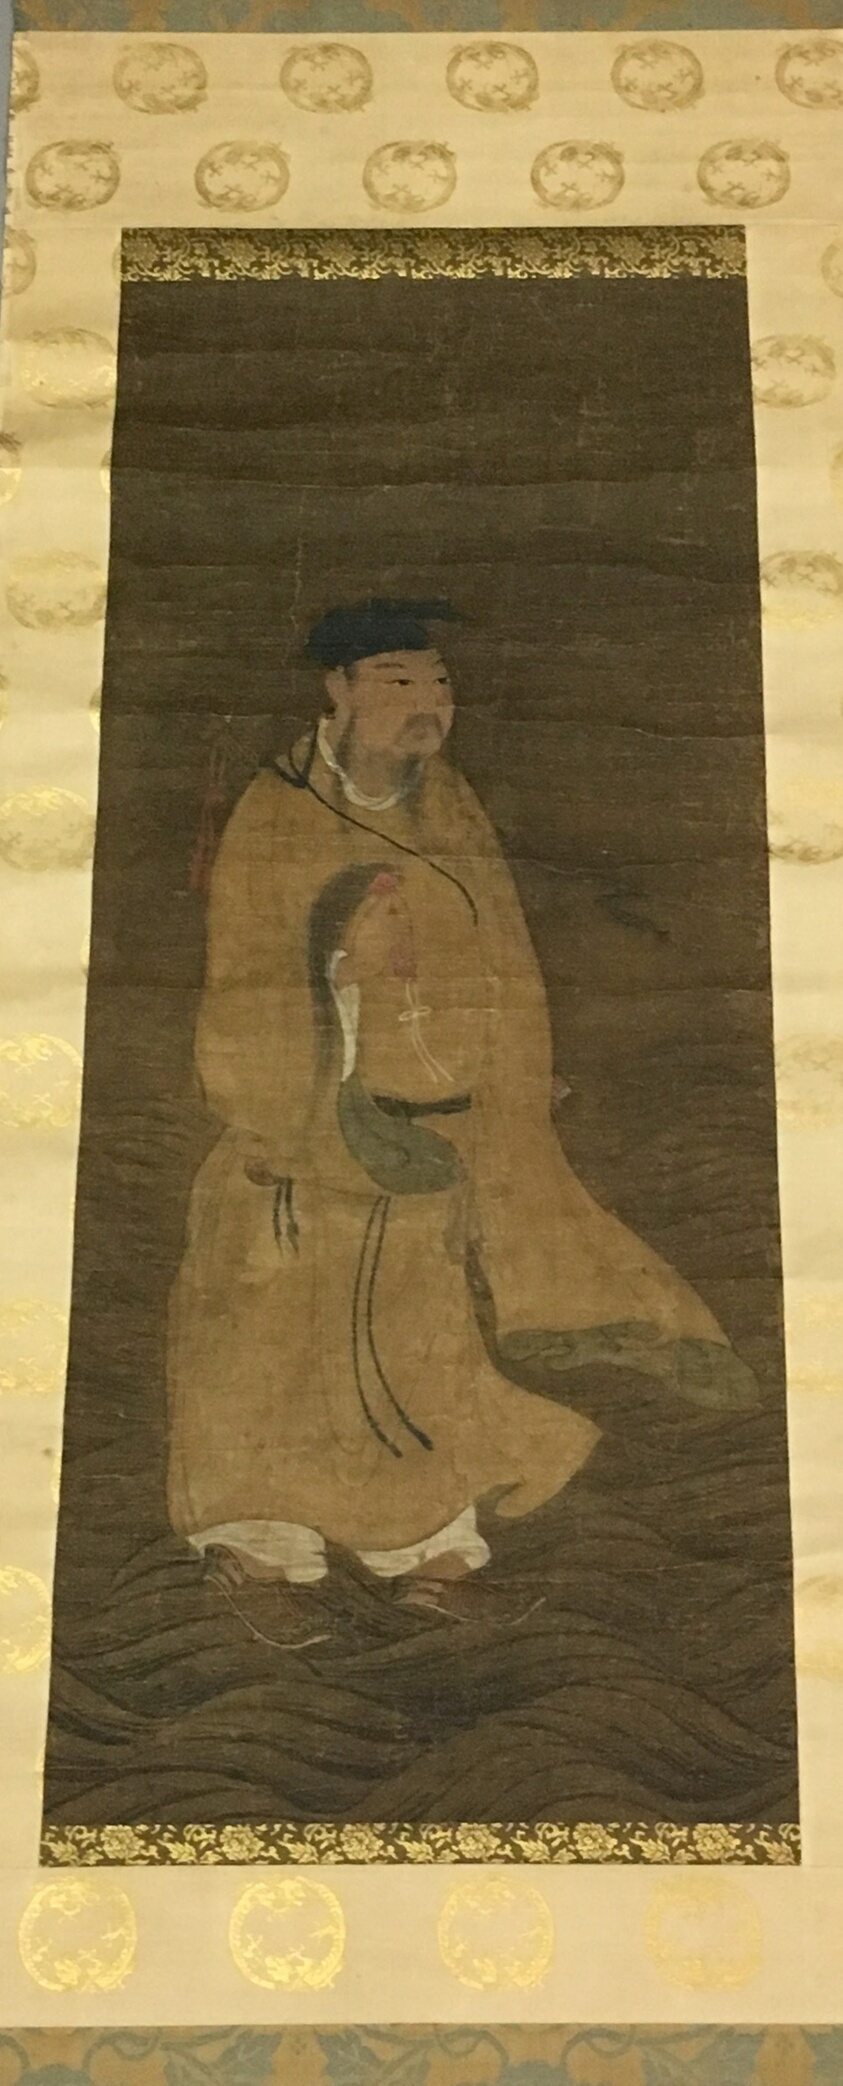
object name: Painting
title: The Daoist Immortal Lu Dongbin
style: yüan, Chinese (culture or style), East Asian, asian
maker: Artist unknown; Chinese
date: Yuan dynasty (1279–1368)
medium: Hanging scroll; ink and color on silk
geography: China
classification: hanging scroll; painting; asian art